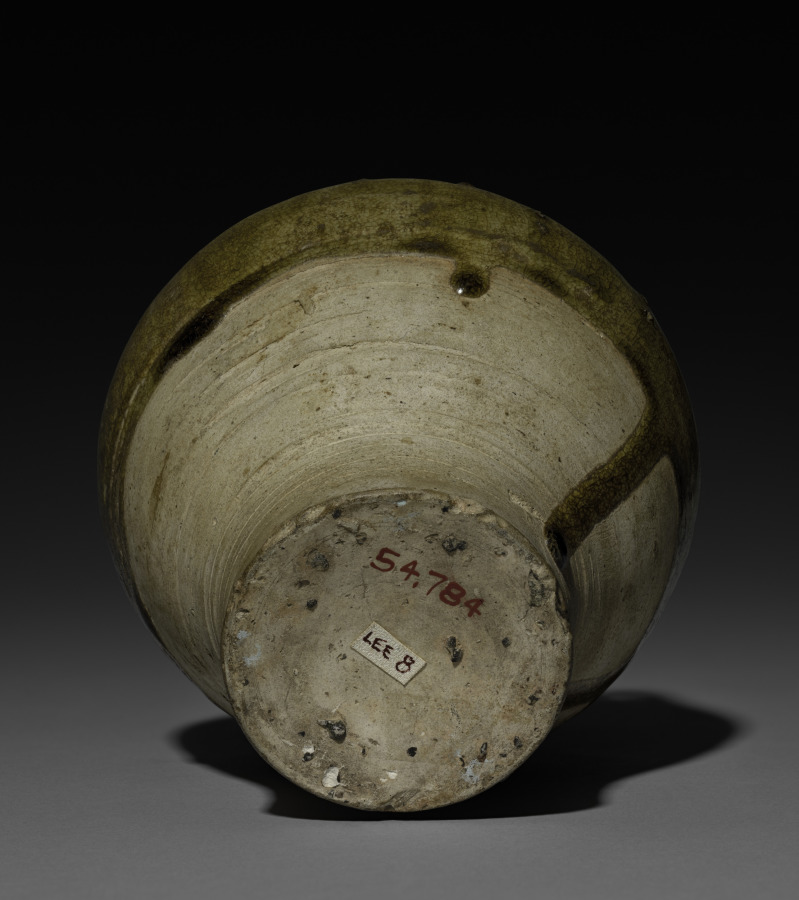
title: Vase with Loop Handles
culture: China, Sui dynasty (581-618)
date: 581–618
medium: glazed stoneware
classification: Ceramic